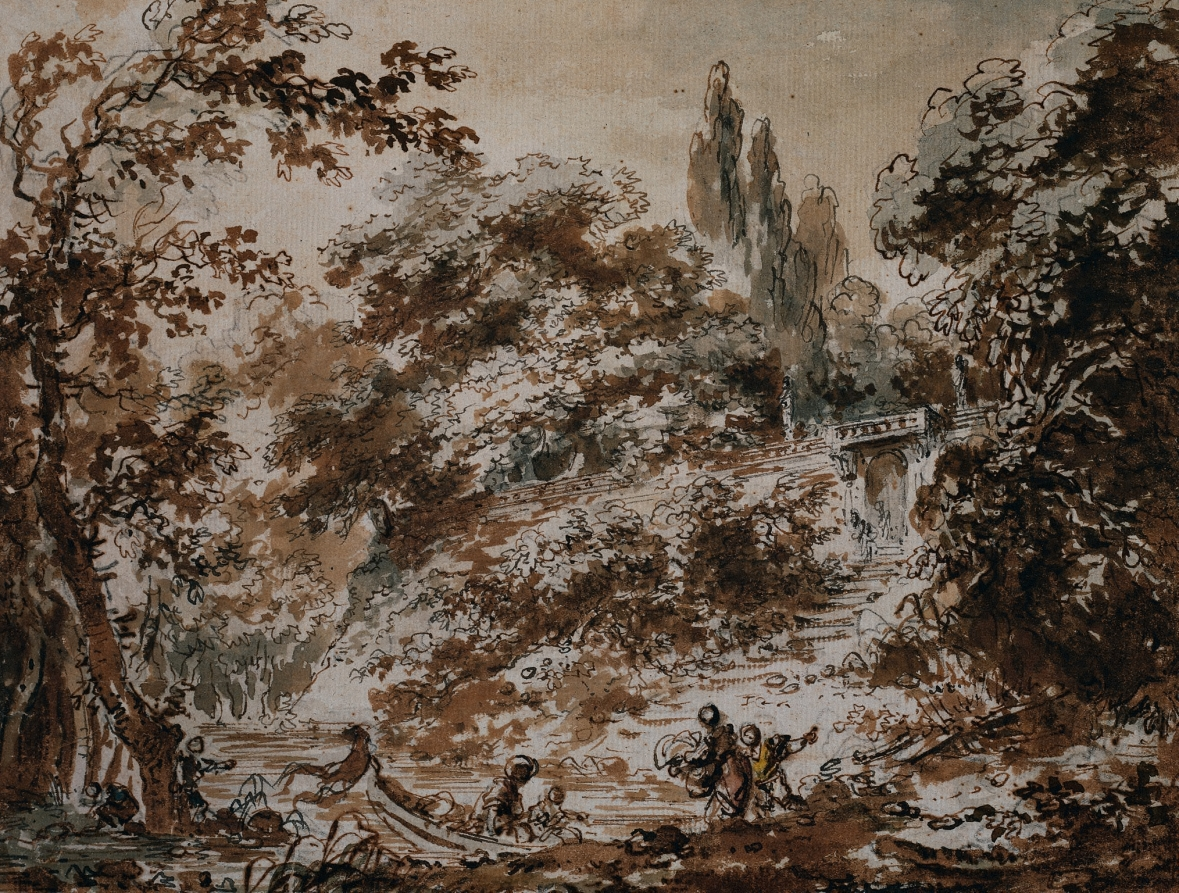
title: Scene in a Park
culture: France, 18th century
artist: Jean-Honoré Fragonard (French, 1732–1806)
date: c. 1760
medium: pen and brown and gray ink, brush and brown and gray wash, and traces of yellow watercolor over black chalk; framing lines in black ink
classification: Drawing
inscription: lower left, in black ink: [illegible]